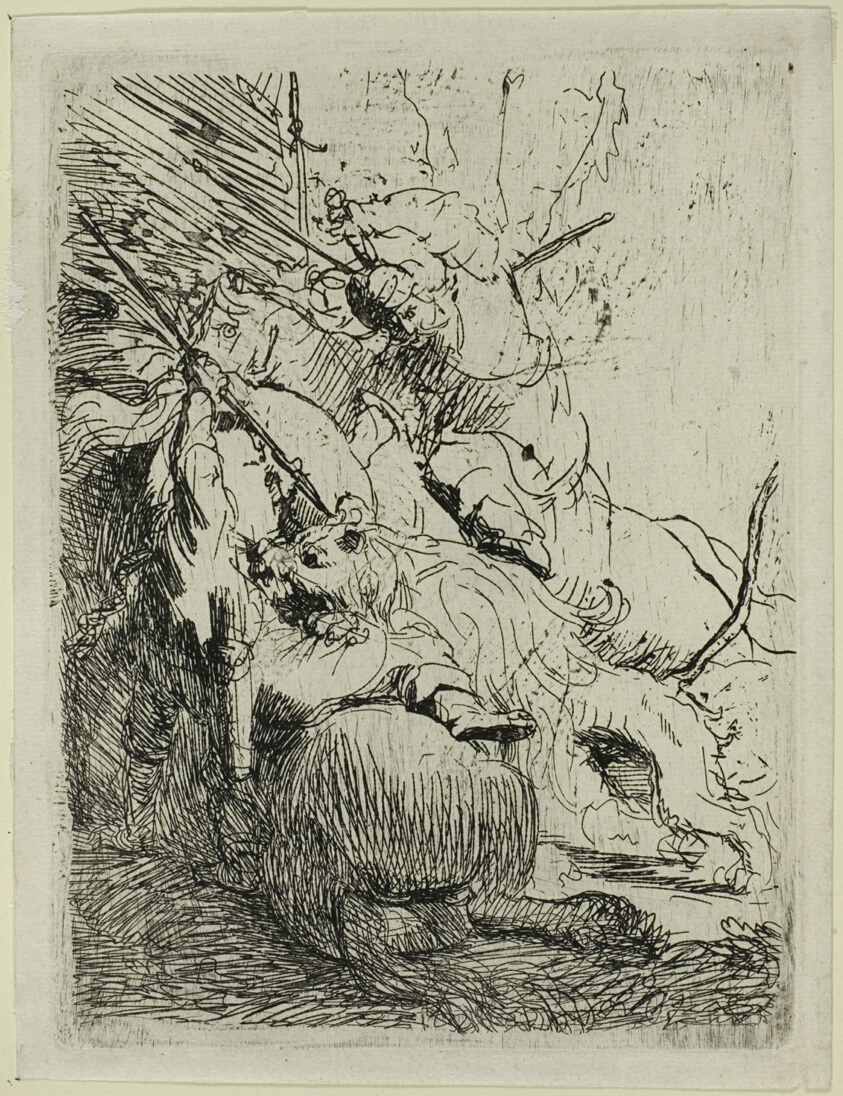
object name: Print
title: The Small Lion Hunt (With One Lion)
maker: Rembrandt van Rijn (Dutch, 1606-1669)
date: c. 1629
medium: Etching on paper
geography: Holland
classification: etching; print; prints and drawing; paper